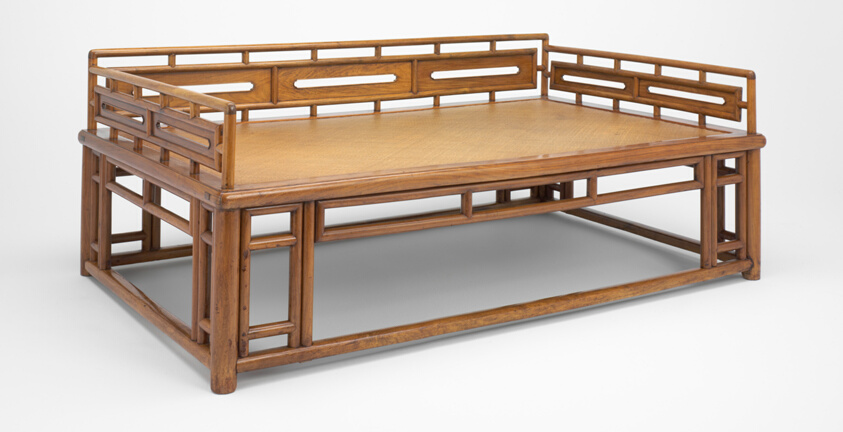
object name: Furniture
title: Couch-Bed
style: Chinese (culture or style)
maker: China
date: late Ming/early Qing dynasty, 17th century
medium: Huanghuali wood with woven-mat seat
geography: China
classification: couch (reclining furniture); furniture